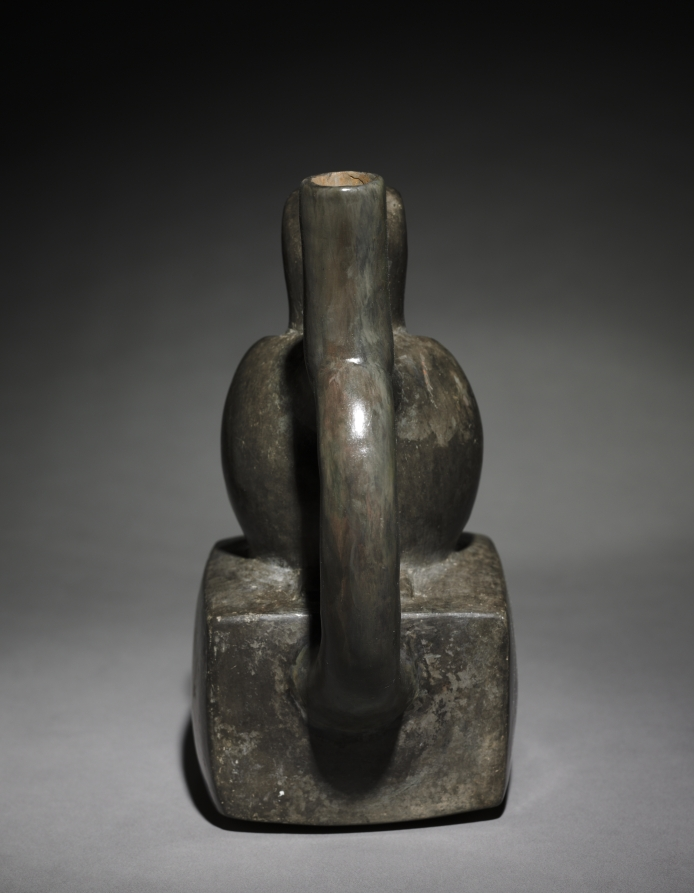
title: Darkware Vessel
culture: Peru, North Coast, Chimú style (900-1470)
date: 900–1470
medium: black ware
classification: Ceramic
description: Under the Chimú, ceramic seems to have been a less important artistic medium than for earlier north coast cultures. Accordingly, ceramics were mass produced with molds and, rather than bearing painted scenes, often have an overall dark surface achieved by firing in a smoky atmosphere.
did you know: Chimú potters fired their vessels in a reduced-oxygen atmosphere to achieve a uniform black surface.